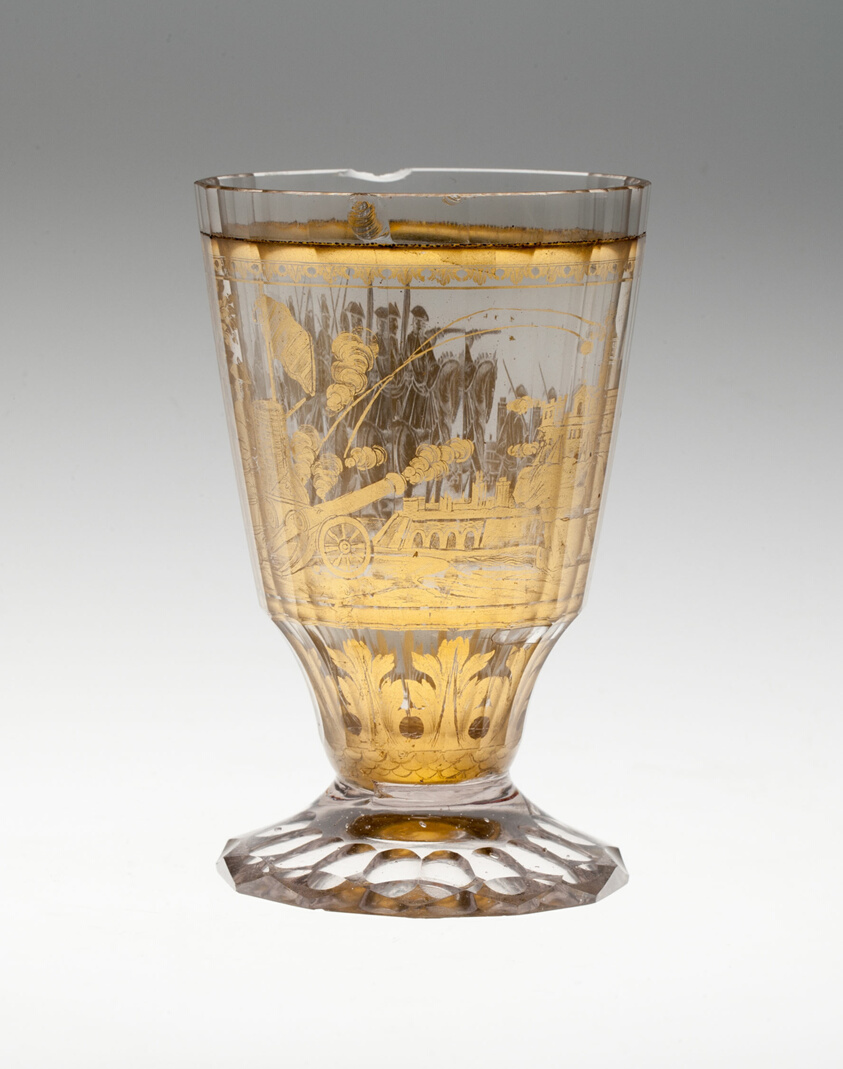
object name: Glass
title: Beaker with Battle Scene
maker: Bohemia, Czech Republic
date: c. 1730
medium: Glass with engraved gold leaf decoration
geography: Bohemia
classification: drinking vessel; glass; european decorative arts